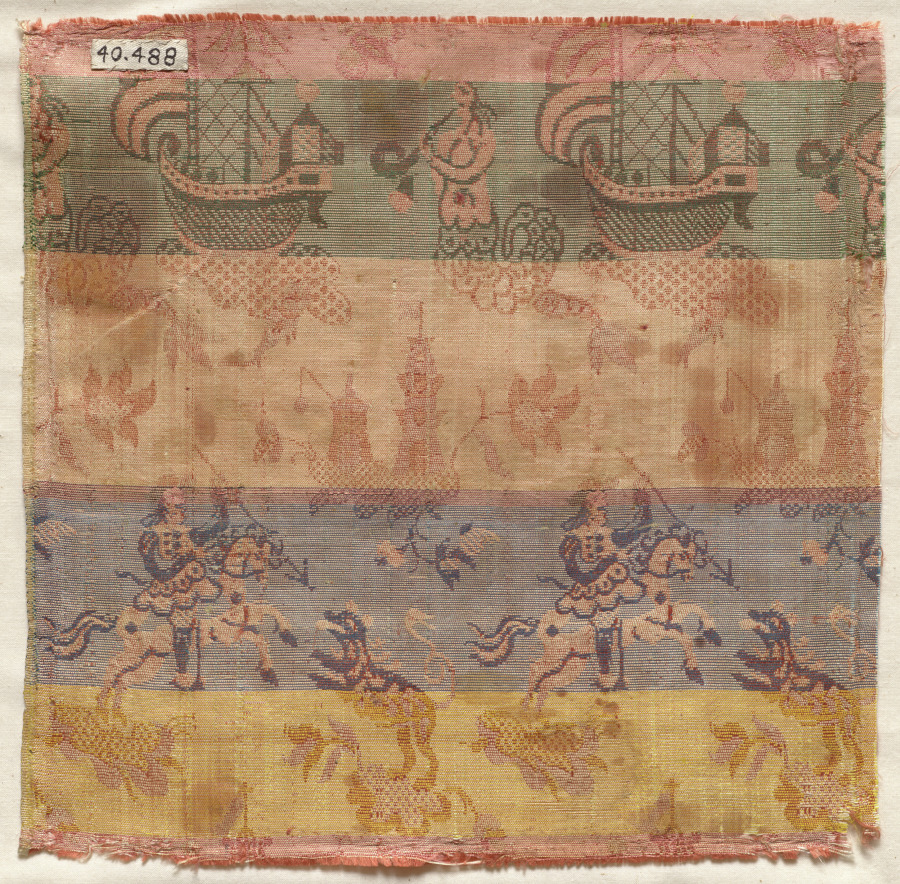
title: Brocaded Satin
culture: Spain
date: 1700s(?)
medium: satin brocaded with silk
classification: Textile